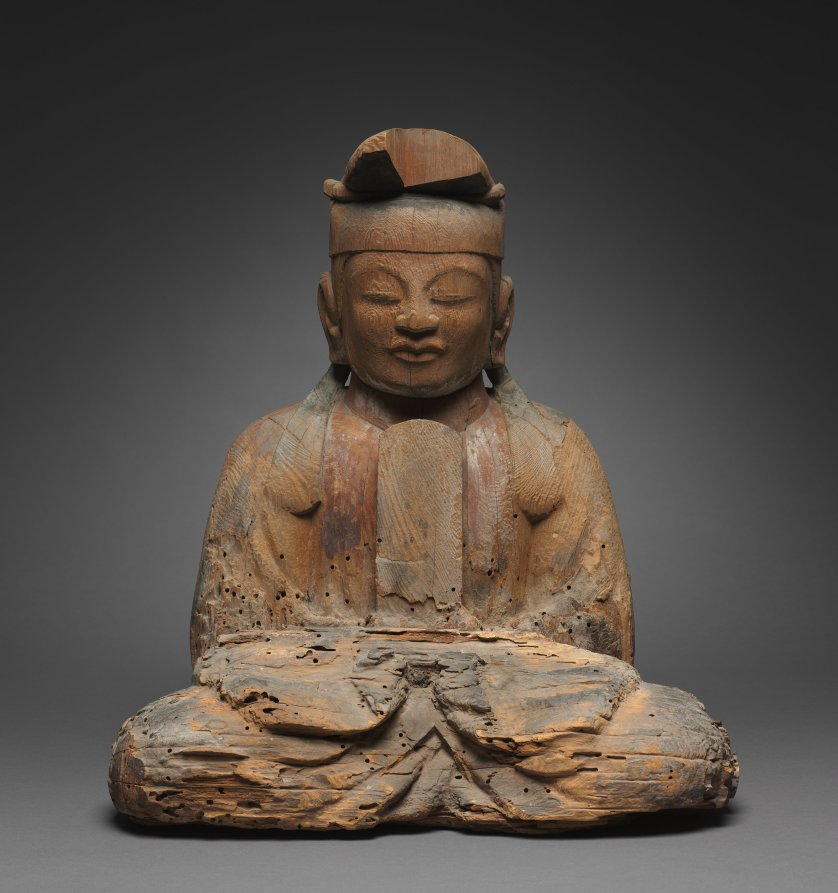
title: Shinto Deity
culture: Japan, Heian period (794–1185)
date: 900s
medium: wood, with traces of polychromy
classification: Sculpture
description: These sculptures represent kami, the name for deities associated with the Japanese religious tradition known as Shinto. They are said to have originally been created for the Usa Hachiman shrine in Oita on the island of Kyushu. Usa Hachiman Shrine houses four main kami: Hime Okami, who assists those engaged in agriculture and sea travel; the legendary 5th-century emperor Ojin deified as the kami Hachiman; Empress Jingu; and the kami of Mount Kawara, who aids copper miners. The identities of these two figures are unknown, but they belong to a larger group containing at least three other deities.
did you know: Traces of pigment on the surface of this sculpture indicate it was once painted.